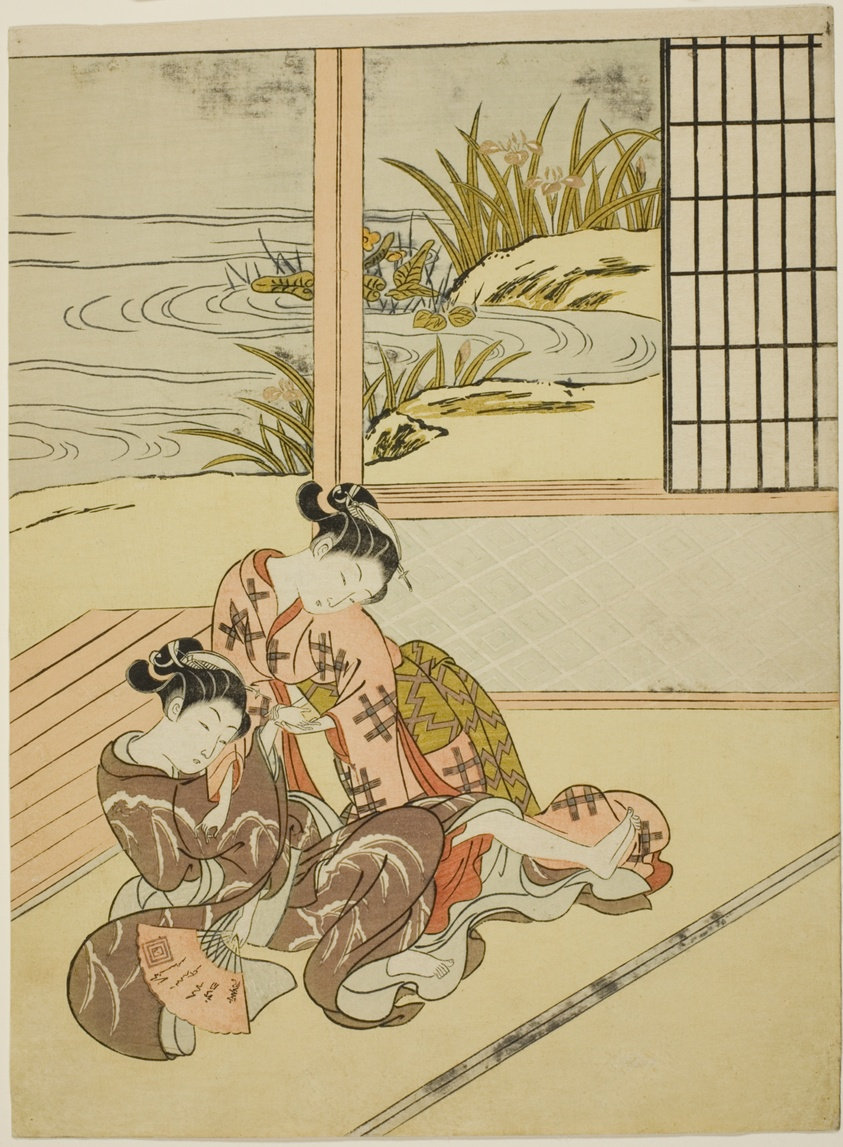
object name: Print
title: Two Women Strugging for a Fan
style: Japanese (culture or style)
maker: Suzuki Harunobu 鈴木 春信; Japanese, 1725 (?)-1770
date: c. 1767/68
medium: Color woodblock print; chuban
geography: Japan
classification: woodblock print; print; asian art